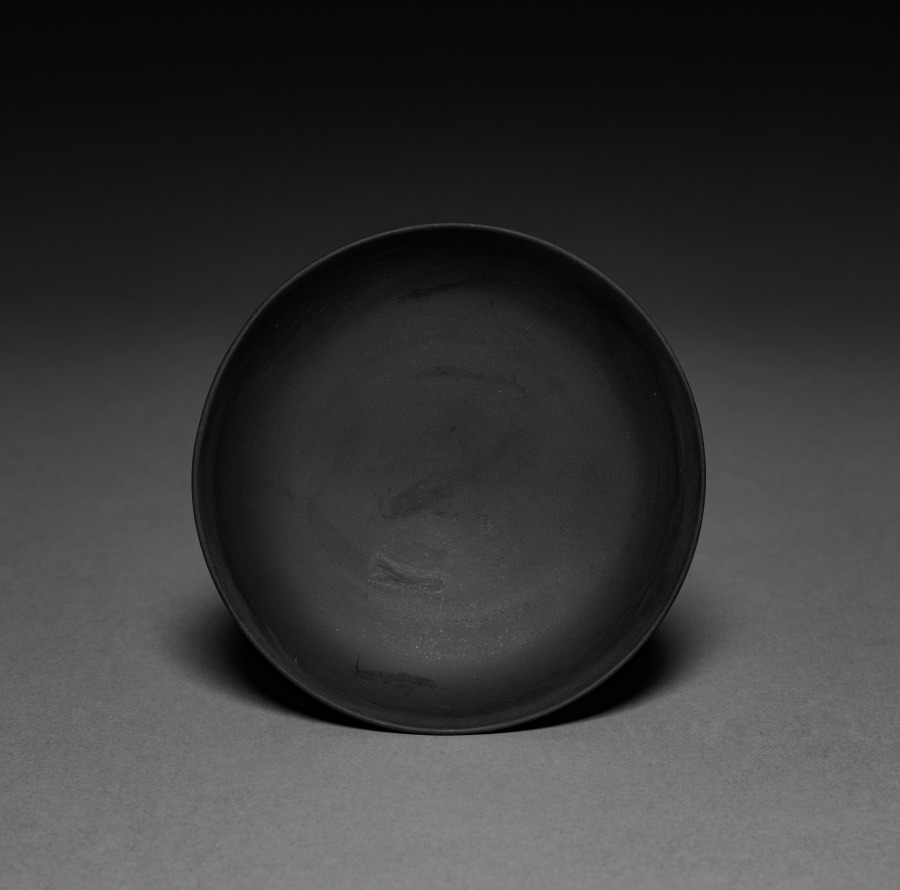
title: Saucer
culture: England, Staffordshire, late 18th century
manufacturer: Wedgwood Factory (British)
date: late 1700s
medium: pottery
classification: Ceramic